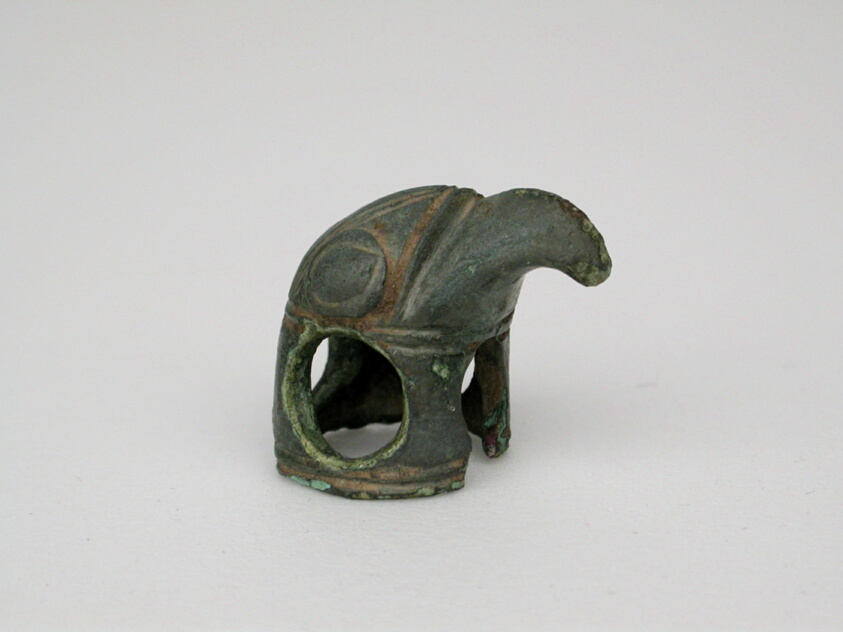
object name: Decorative Arts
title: Hawk Head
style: geometric, ancient, greek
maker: Greek; Thessaly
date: Geometric Period (800–600 BCE)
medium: Bronze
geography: Greece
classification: votive offering; ex-voto; decorative arts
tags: bird